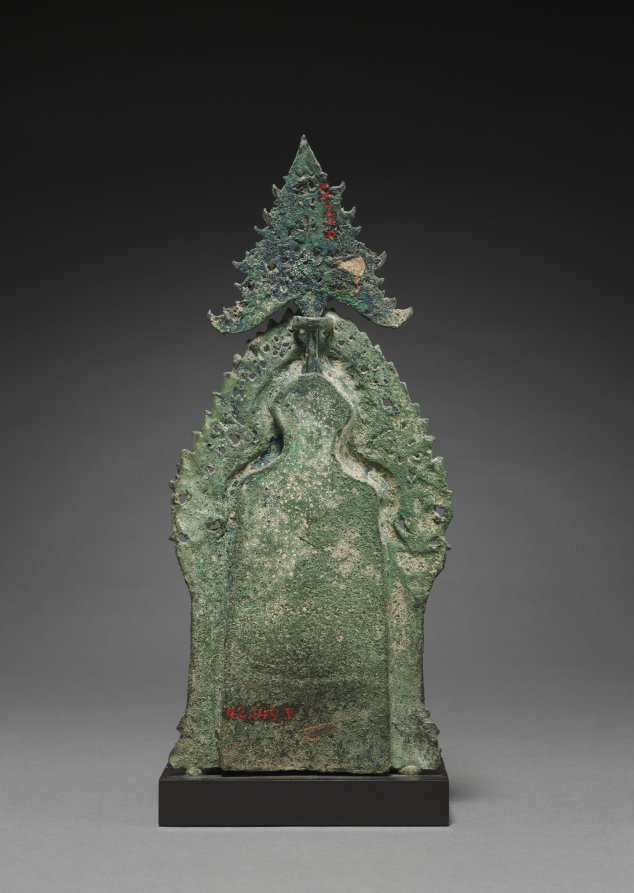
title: Altarpiece with Buddha Enthroned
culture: Cambodia, found in Vietnam, near Ho Chi Minh City, Reign of Suryavarman II, Angkor Wat Period, 1st half 12th Century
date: mid-1100s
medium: bronze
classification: Sculpture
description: The crown and jewels of this Buddha indicate that he is a transcendent Buddha, not the historical Buddha who lived in the 5th century BCE. Small-scale bronze images of transcendent Buddhas were used in tantric practices as personal meditation images or in ritual settings. Tantric Buddhism was adopted as the state religion during the 12th century in the region of Angkor. A depiction of the tree that references the moment of the Buddha’s enlightenment is above the scalloped serpentine form of the niche under which he sits enthroned on an altar. An object interpreted as a lotus bud rests on the hands in his lap as he sits in a posture of meditation.